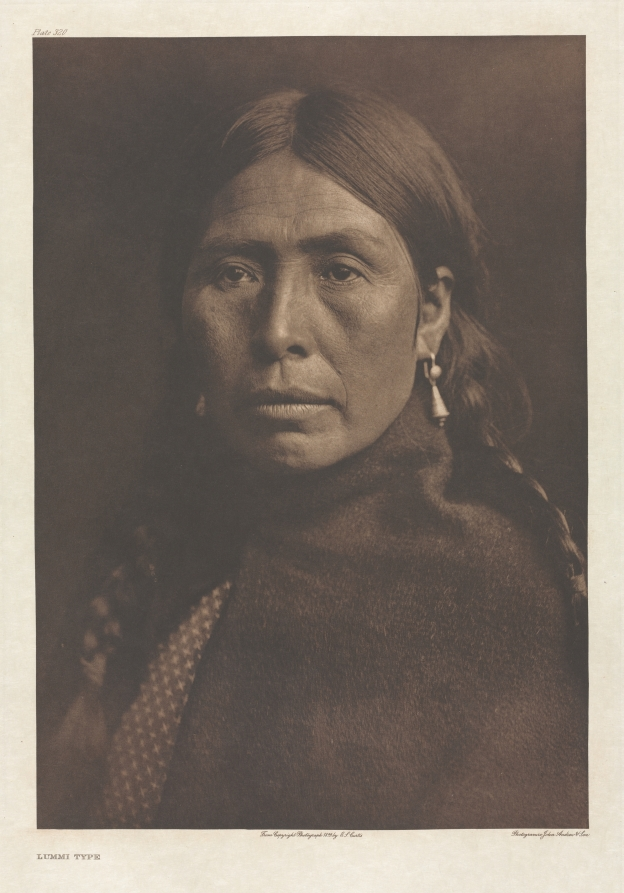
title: Portfolio IX, Plate 320: Lummi Type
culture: America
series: The North American Indian: being a series of Portfolios picturing and describing the Indians of the United States, the Dominion of Canada, and Alaska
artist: Edward S. Curtis (American, 1868–1952)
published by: The University Press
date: 1899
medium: photogravure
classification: Portfolio